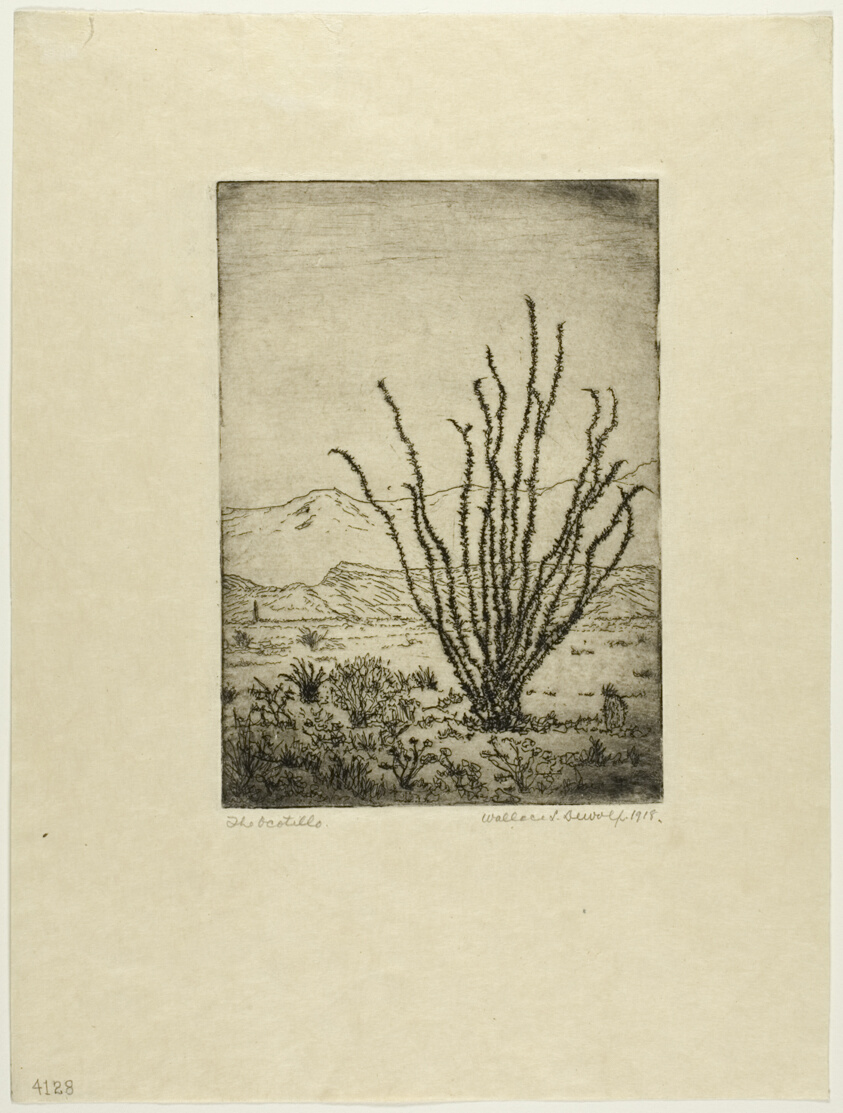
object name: Print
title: The Ocotillo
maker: Wallace L. DeWolf (American, 1854-1930)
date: 1918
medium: Etching on cream wove paper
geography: United States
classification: etching; print; prints and drawing